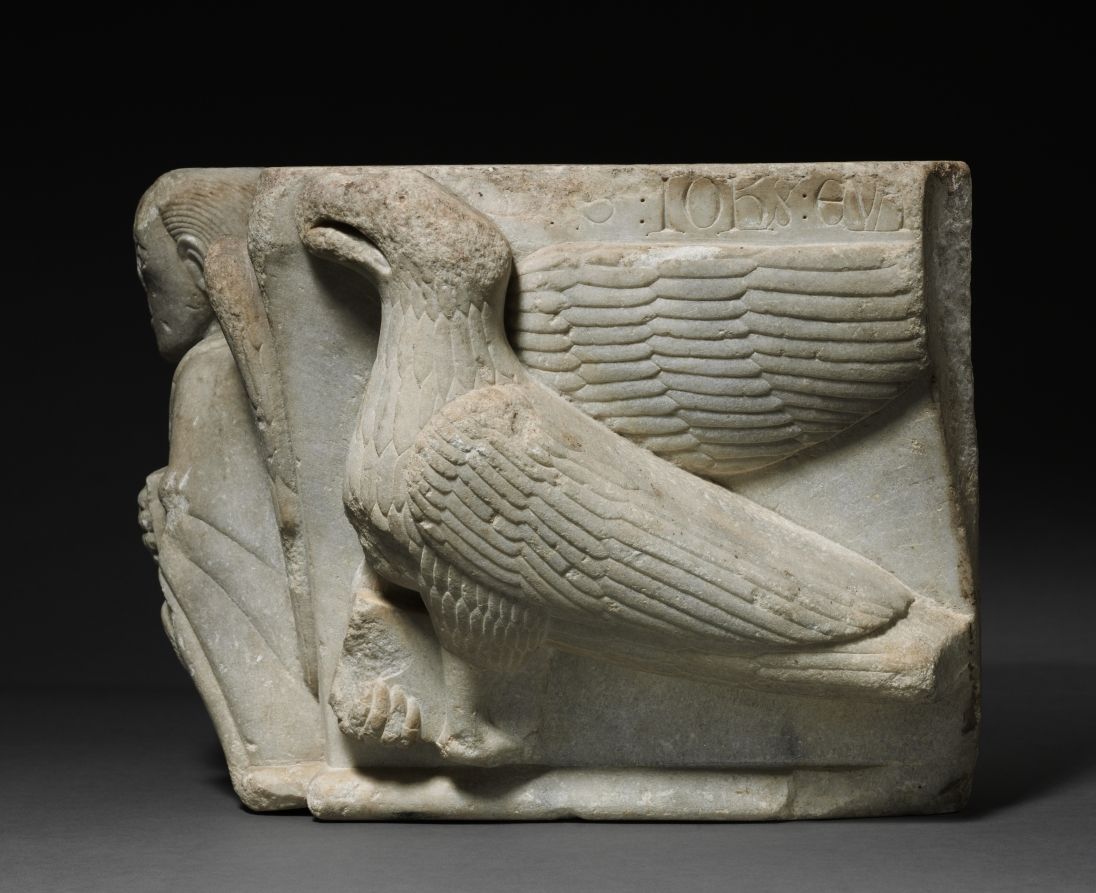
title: Engaged Capital with Figures of a Man and of an Eagle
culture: Northern Italy, Emilia (Bologna?), 12th century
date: 1175–1200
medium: marble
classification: Sculpture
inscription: face with half-figure of an angel with Gosepl bears the inscription: S. MAT; face with an eagle holding Gospel bears the inscription: S. IOHS. EVA.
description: These creatures, as indicated by their Latin inscriptions, are symbols personifying the Evangelists Matthew (man) and John (eagle). This iconography derives from the Book of Revelation.